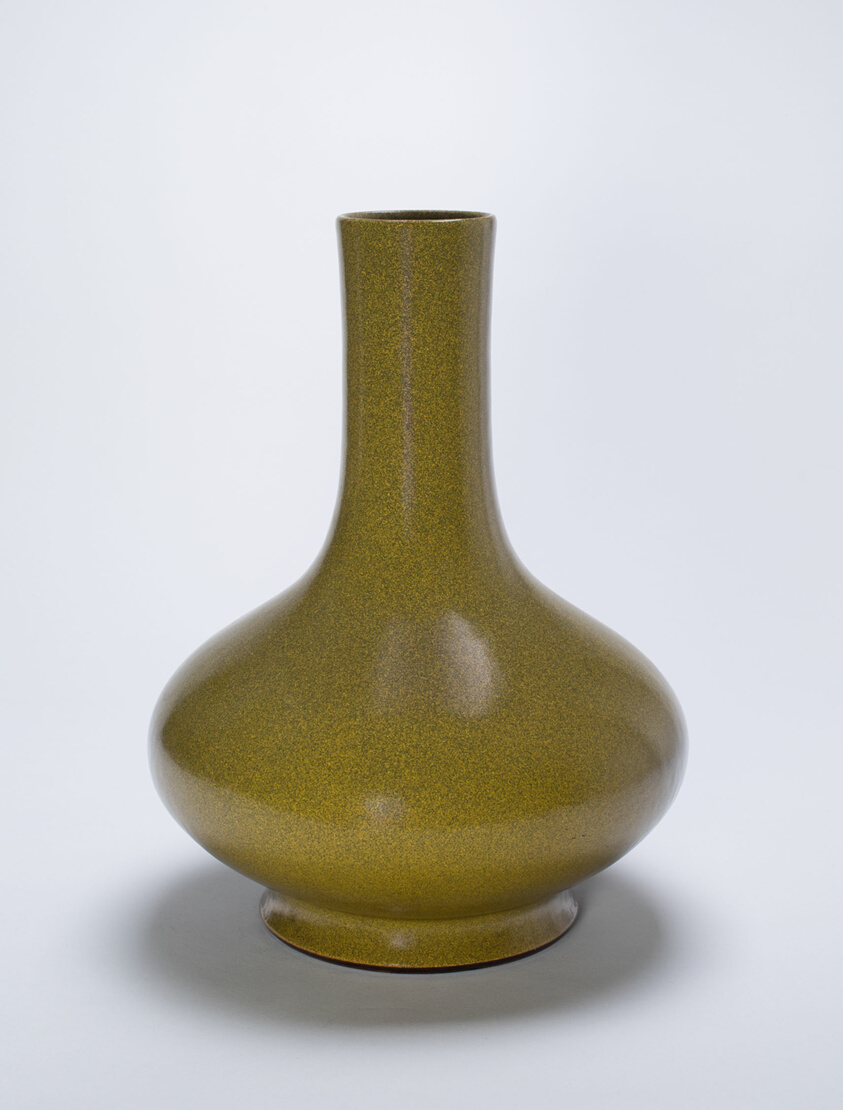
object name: Vessel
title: Bottle-Shaped Vase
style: Chinese (culture or style)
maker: China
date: Qing dynasty (1644–1911), Qianlong reign mark and period (1736–1795)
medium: Porcelain with tea dust glaze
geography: China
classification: vase; porcelain; vessel; asian art; ceramics